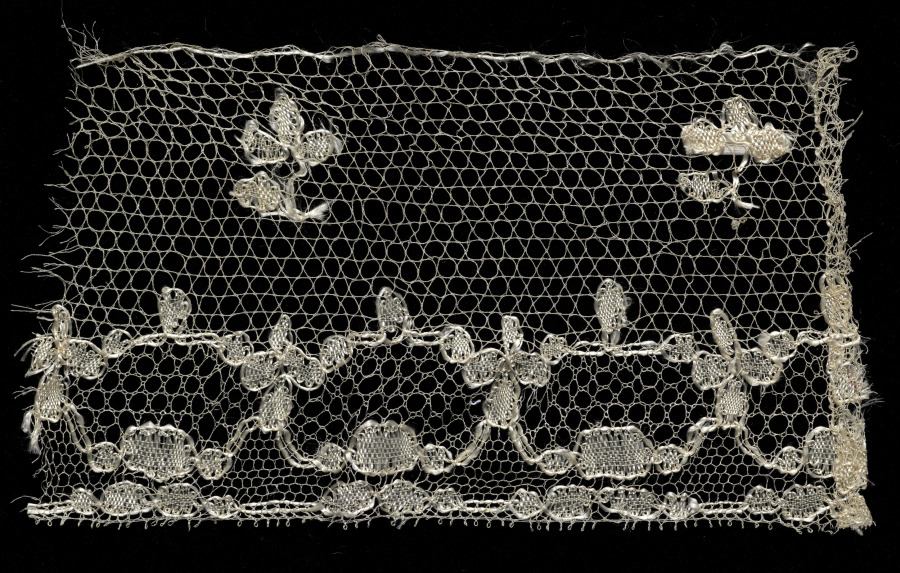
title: Lace Edging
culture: Spain, Seville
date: 1780–99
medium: Silk: bobbin lace (blonde lace)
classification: Lace